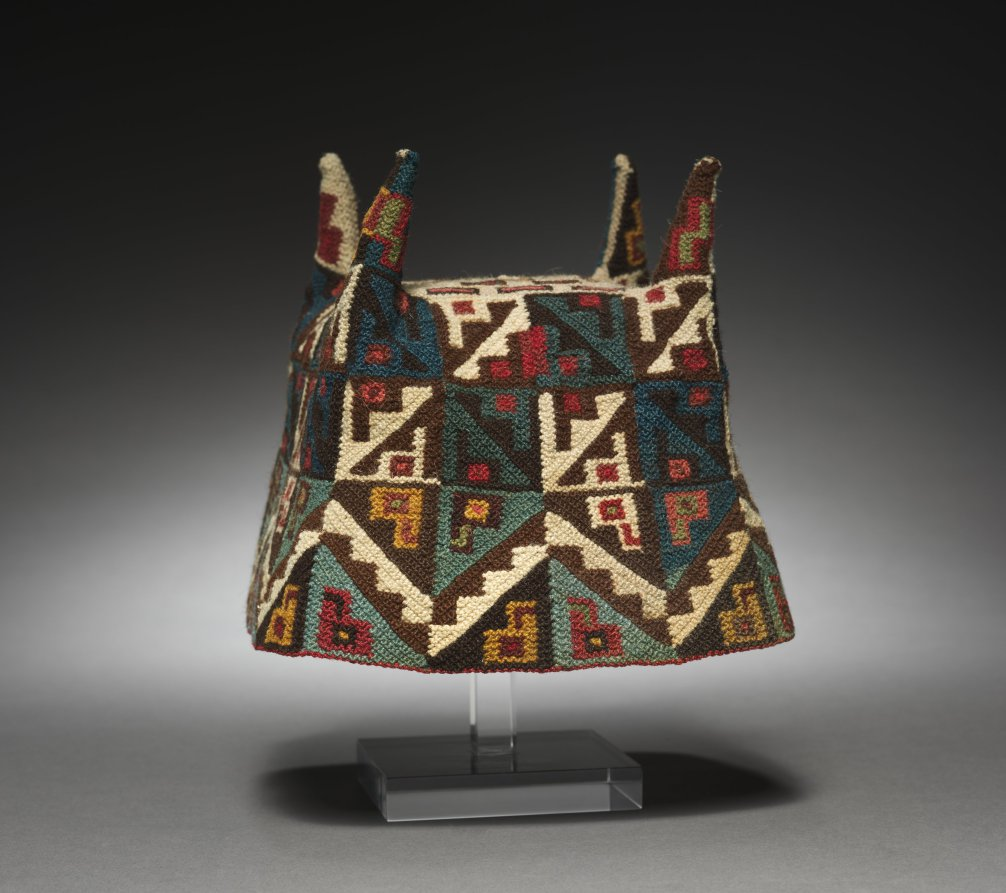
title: Four-Cornered Hat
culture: Peru, South Andes or Chile, Northern Andes, Tiwanaku style, 5th-10th Century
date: c. 400–1000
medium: alpaca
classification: Textile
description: A distinctive type of Tiwanaku and Wari headgear was a hat with four ear-like peaks rising from the corners. Depicted on warriors and other men who wear prestigious clothing and ornaments, the hats were made with knots, visible on all sides of this handsome Tiwanaku example. The hat is decorated with a pattern that includes a profile bird head.